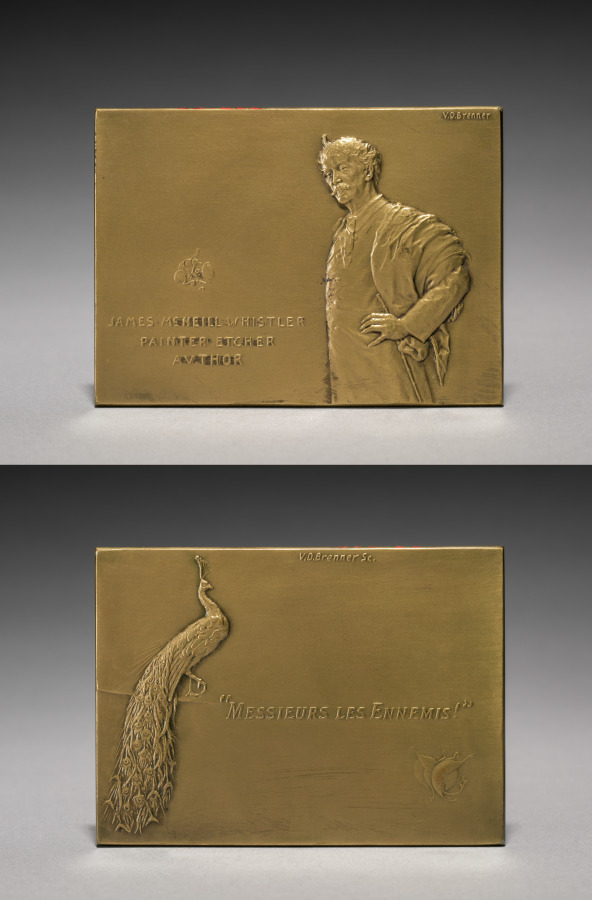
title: Whistler Medal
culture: America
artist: Victor D. Brenner (American, 1871–1924)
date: 1900s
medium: bronze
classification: Metalwork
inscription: obverse - Whistler's butterfly monogram and the inscription: "JAMES MCNEILL WHISTLER"/" PAINTER ETCHER"/" AVTHOR"; above, signed: "V. D. Brenner." reverse - "Messieurs les Ennemis."